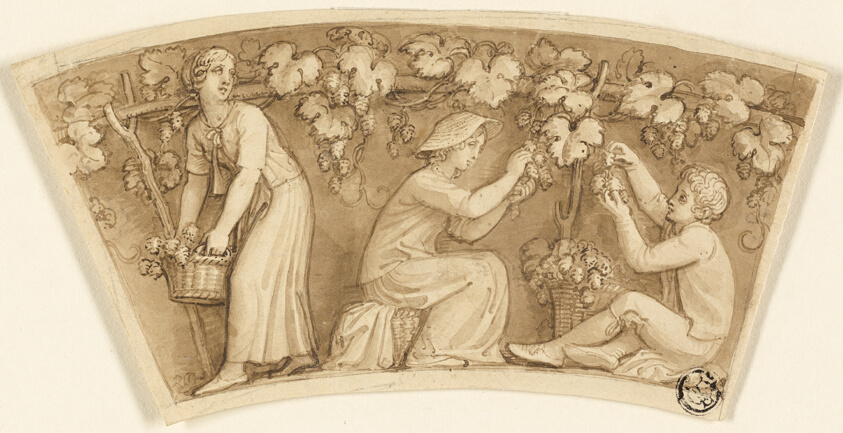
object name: Drawing and Watercolor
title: The Hop Gatherers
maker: Thomas Stothard (English, 1755-1834)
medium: Pen and brown ink with brush and brown wash, on cream wove paper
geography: England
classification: ink or chalk wash; drawings (visual works); prints and drawing